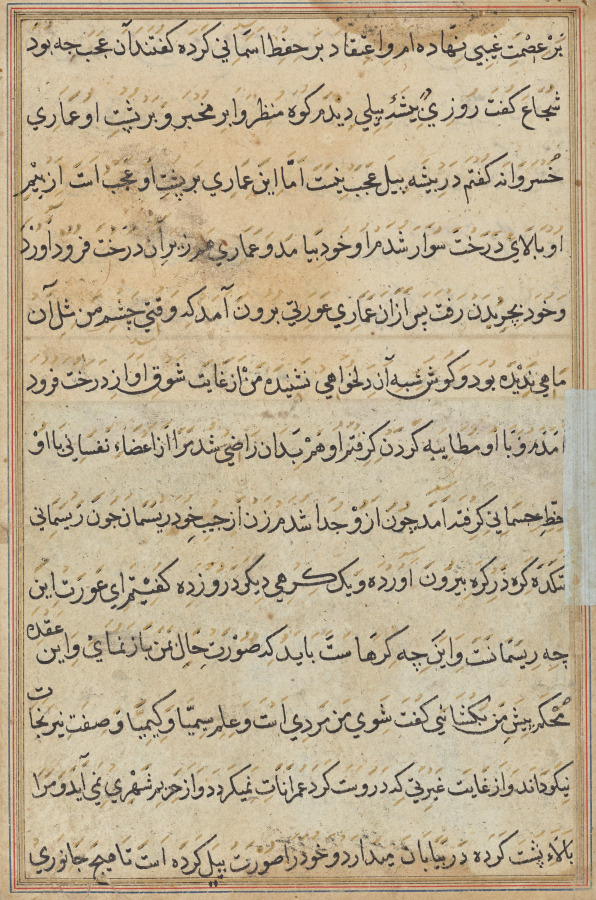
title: The mendicant’s wife deceives him with a soldier, from a Tuti-nama (Tales of a Parrot): Fourth Night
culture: Mughal India, court of Akbar (reigned 1556–1605)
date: c. 1560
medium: gum tempera, ink, and gold on paper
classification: Painting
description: According to this story, written in Persian, a skilled yogi in India reached such a high level of practice that he was able to perform acts of transformation. Anxious to prevent his wife from committing adultery, he transformed himself into an elephant and carried her hidden in a howdah on his back and stayed only in the deep forest, away from men. One day, when the elephant was out foraging for food, a lone soldier came upon the wife, and they made love. The moral of the story is that no matter how extreme the lengths to which one might go to prevent adultery, if someone is inclined to do so, it will happen.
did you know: Discoloration around the elephant’s face and legs indicate that his body has been repositioned.